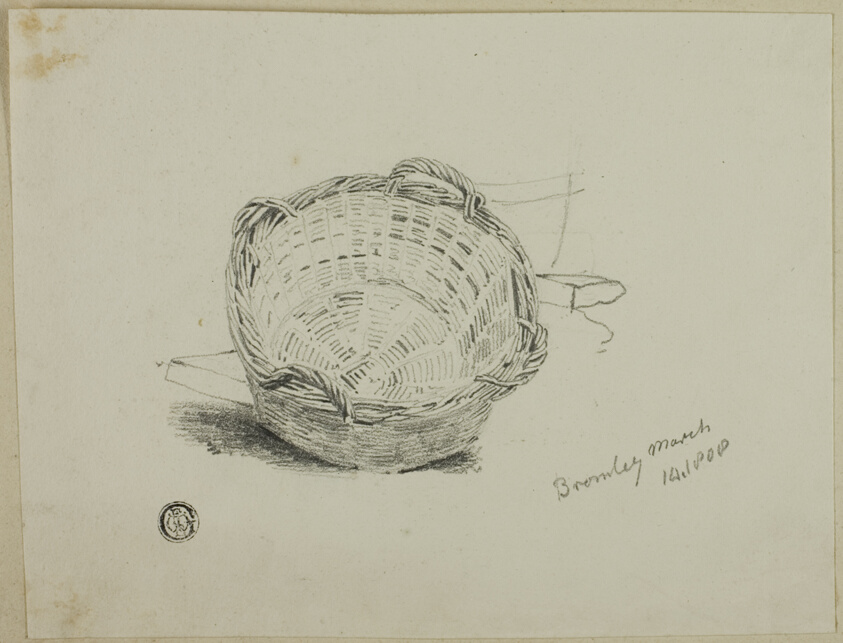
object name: Drawing and Watercolor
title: Wickerwork Washbasket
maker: Joshua Cristall (English, c. 1767-1847)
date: 1808/47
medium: Black crayon, on cream wove paper, tipped on cream wove paper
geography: England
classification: graphite; drawings (visual works); prints and drawing